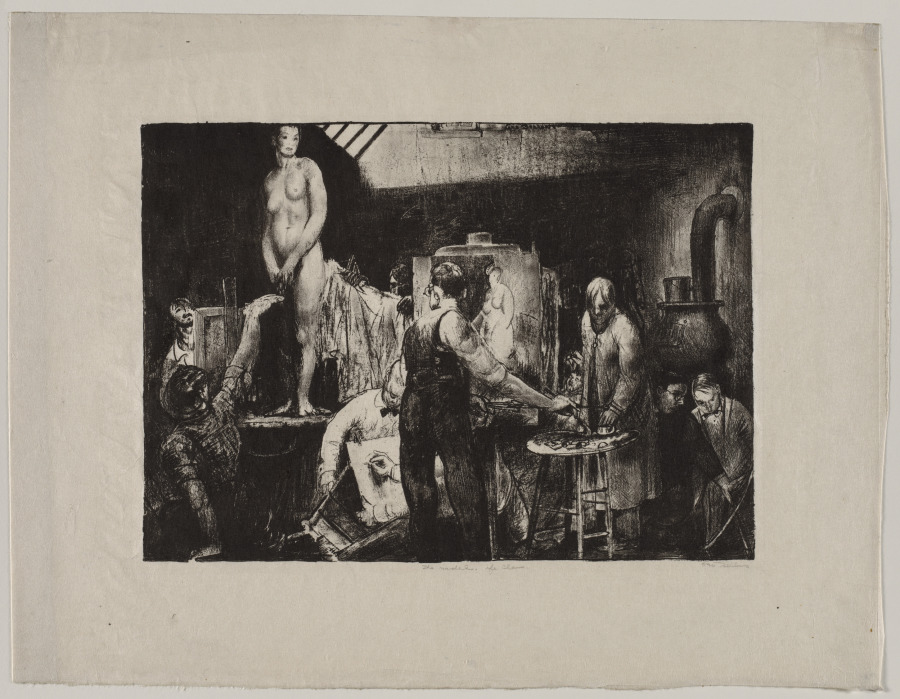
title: "The Life Class"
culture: America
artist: George Bellows (American, 1882–1925)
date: 1916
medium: lithograph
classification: Print